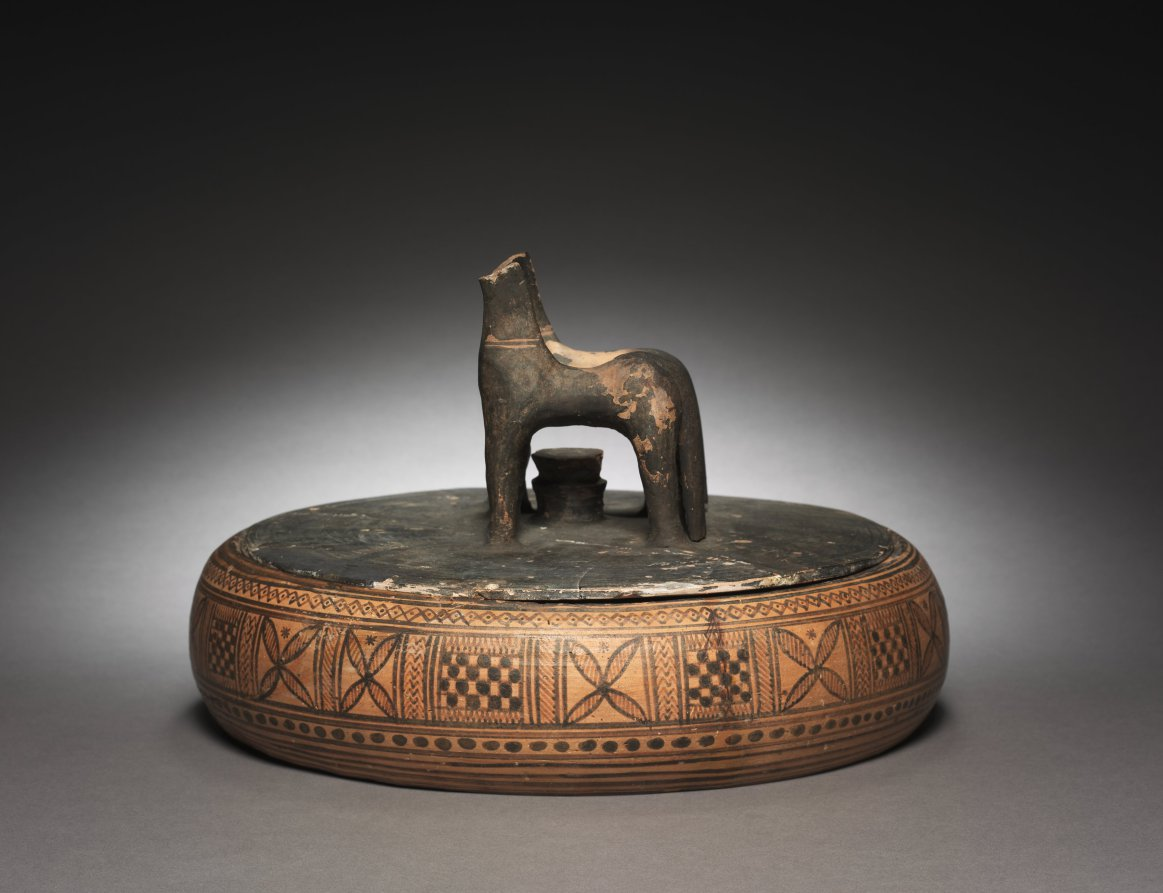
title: Geometric Horse Pyxis (Cylindrical Lidded Box)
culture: Greek, Attic, Late Geometric la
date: c. 760–750 BCE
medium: ceramic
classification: Ceramic